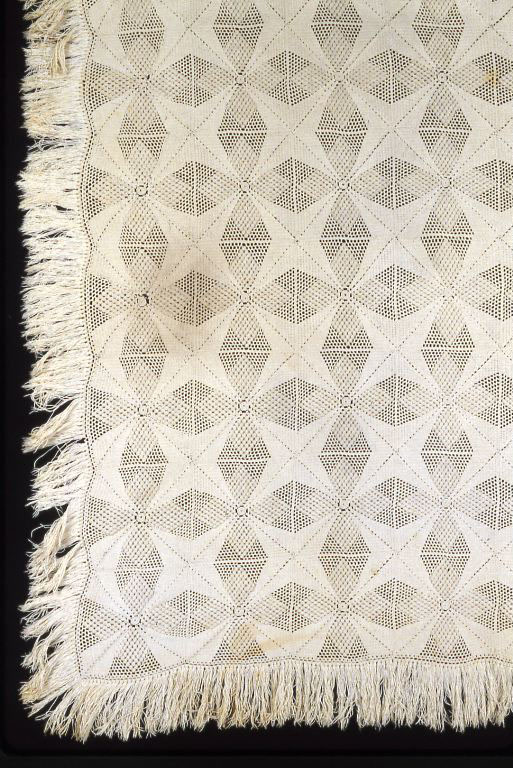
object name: Textile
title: Bedcover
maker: United States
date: 19th century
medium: Cotton, crochet; knotted cut fringe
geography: United States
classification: textile; needlework (visual works); needlework - quilt